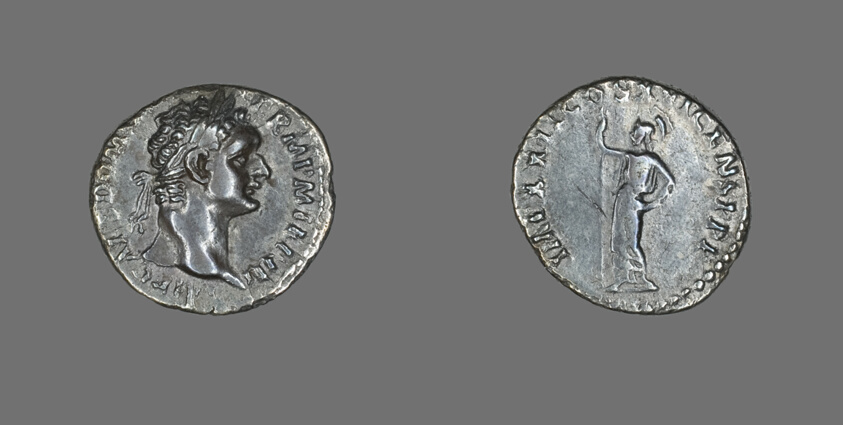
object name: Coin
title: Denarius (Coin) Portraying Emperor Domitian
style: roman (ancient, style or period)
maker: Roman, minted in Rome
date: 93-94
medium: Silver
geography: Roman Empire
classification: coin; ancient art